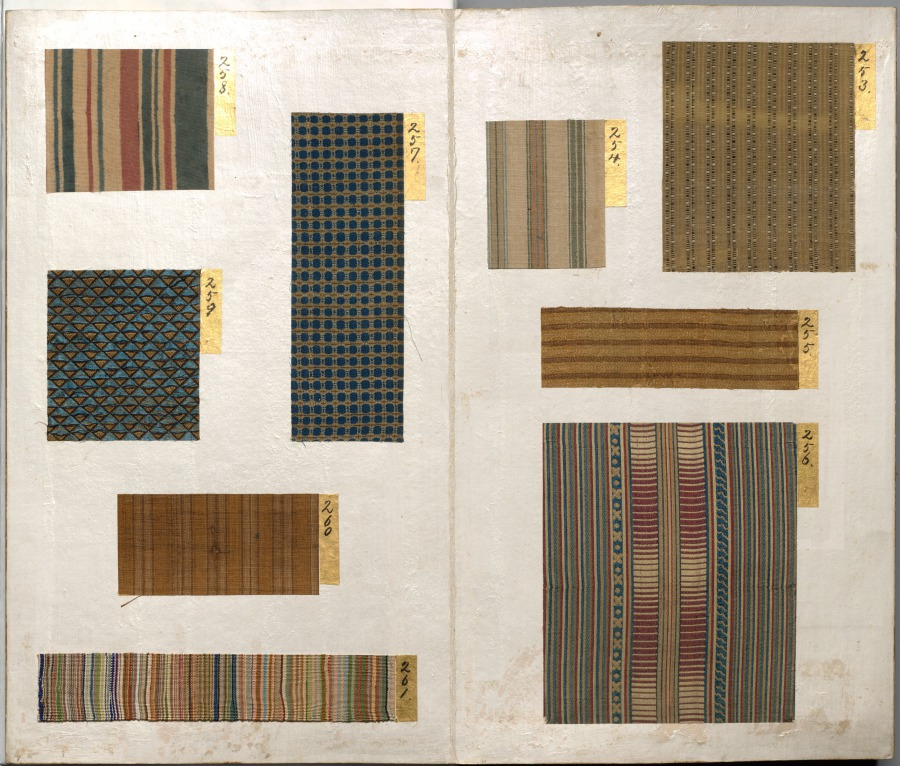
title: Album of Textile Samples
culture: Japan, Edo period (1615–1868)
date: 1600s-1700s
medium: silk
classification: Textile